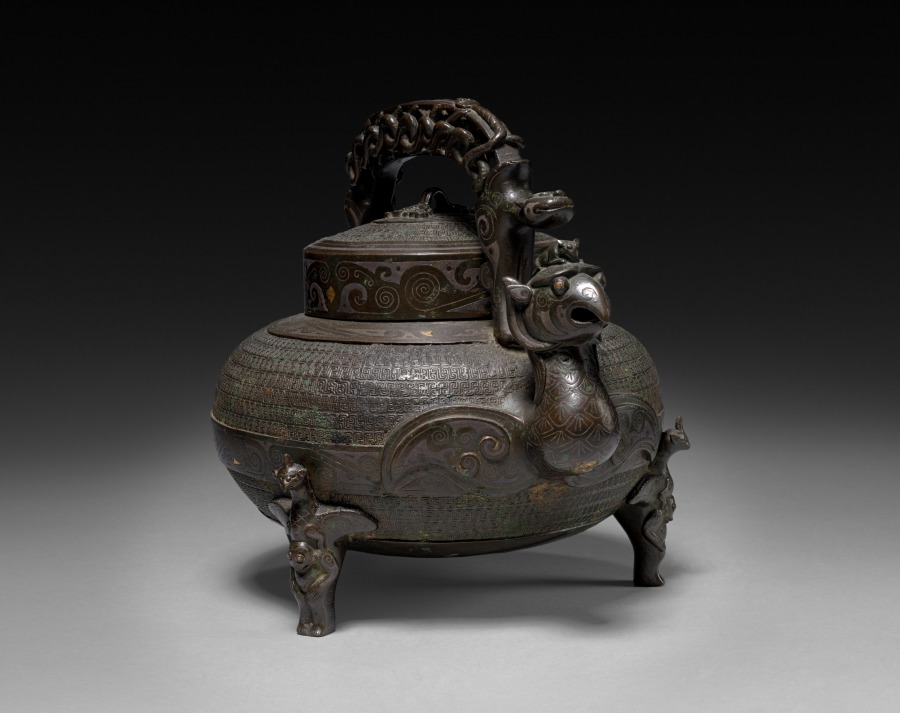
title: Kettle with Handle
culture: China, Qing dynasty (1644-1911) or Republican period (1912-49)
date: 1700s–1800s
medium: bronze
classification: Metalwork